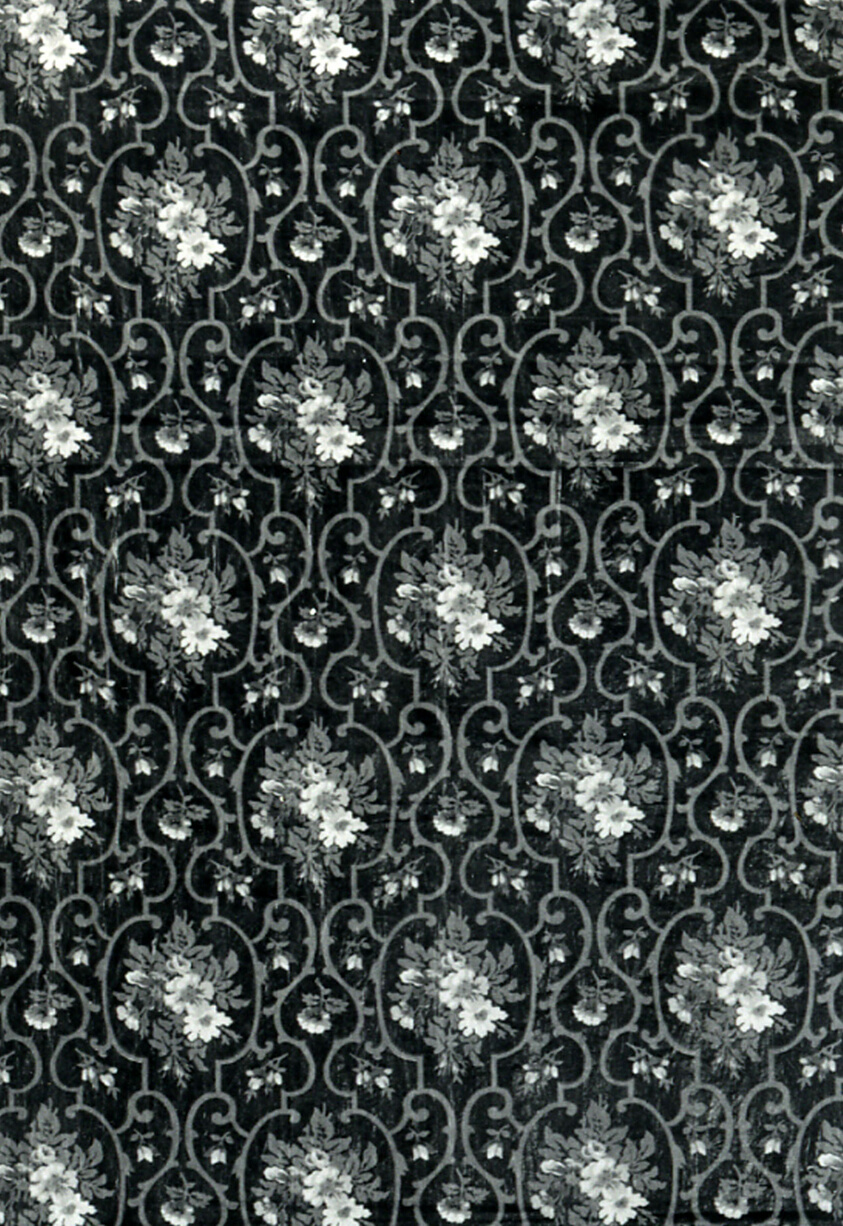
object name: Textile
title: Panel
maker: England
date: c. 1850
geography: England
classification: textile; weaving - printed